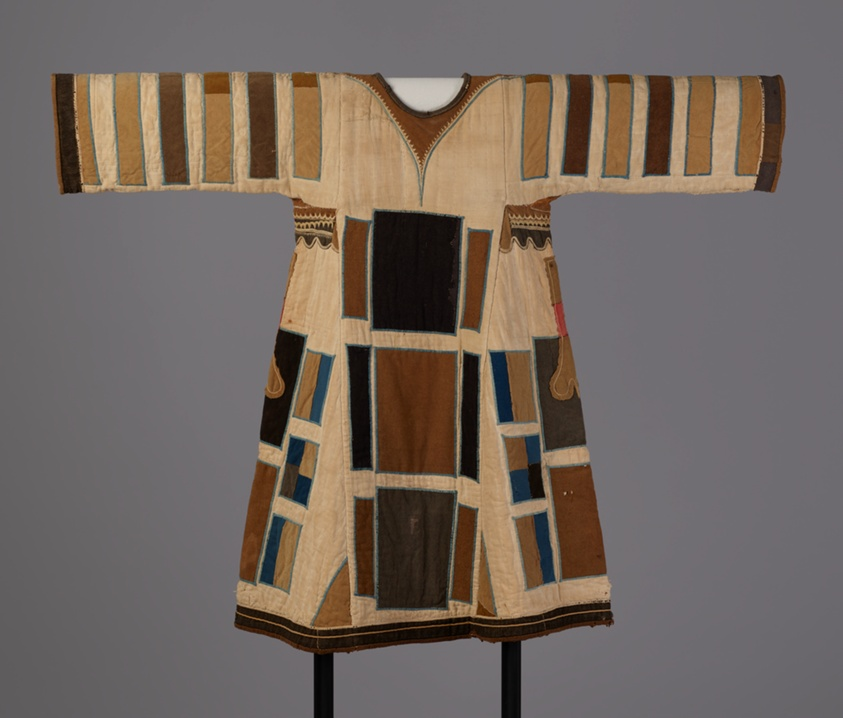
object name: Costume and Accessories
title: Tunic (Jibbeh)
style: Arts of Africa, 19th century, east african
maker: Mahdiyya State, Sudan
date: 1885/99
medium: Layers of cotton, plain weave; pieced and quilted; appliquéd with wool and wool and cotton plain weaves and wool twill weaves; embroidered with cotton in chain, cross, and a derivative of herringbone stitches; applied plied yarn edging; lined with cotton plain weaves; pieced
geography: Sudan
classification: tunic; arts of Africa; costume; garment; textile; dress (garment)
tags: garment, rectangles, black (color), tan (color), brown (color), lines, colonialism, Freedom, military, military uniforms, soldiers, uniforms